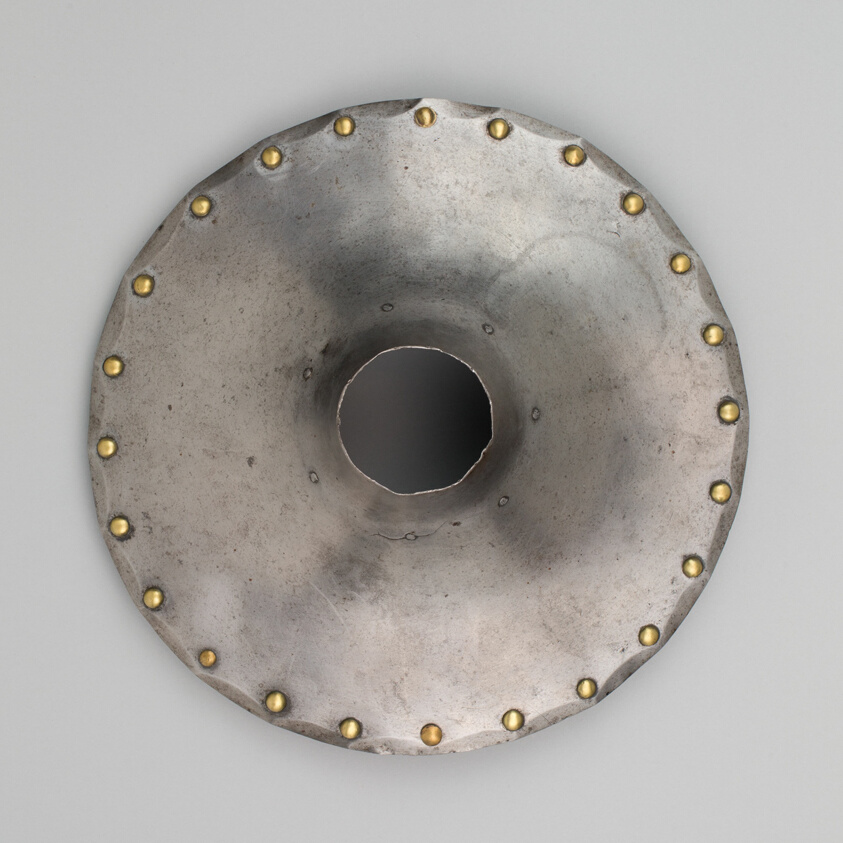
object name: Arms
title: Jousting Lance with Vamplate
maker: German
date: 1560/80, modern lance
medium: Steel, leather, and wood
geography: Germany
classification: edged weapon-staff; arms; arms and armor